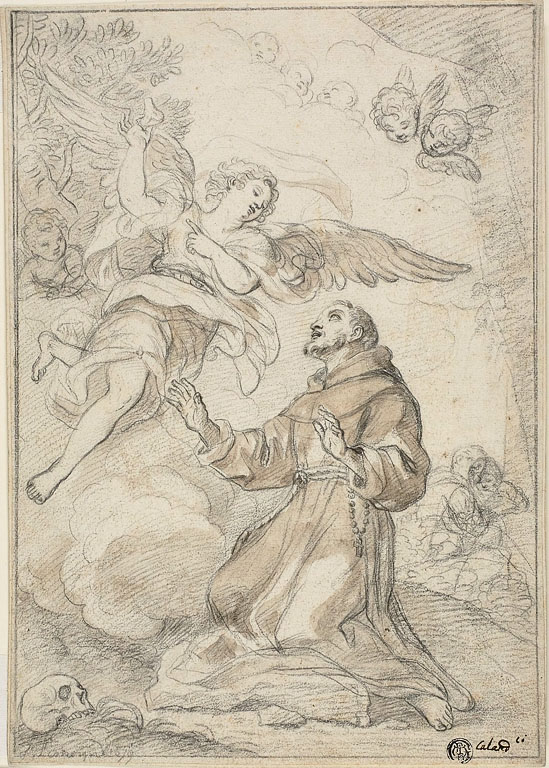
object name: Drawing and Watercolor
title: Angel Appearing to Saint Dominic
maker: Giacinto Calandrucci (Italian, 1646-1707)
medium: Black chalk, with brush and brown wash, on ivory laid paper, laid down on cream wove paper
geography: Italy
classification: chalk; drawings (visual works); prints and drawing